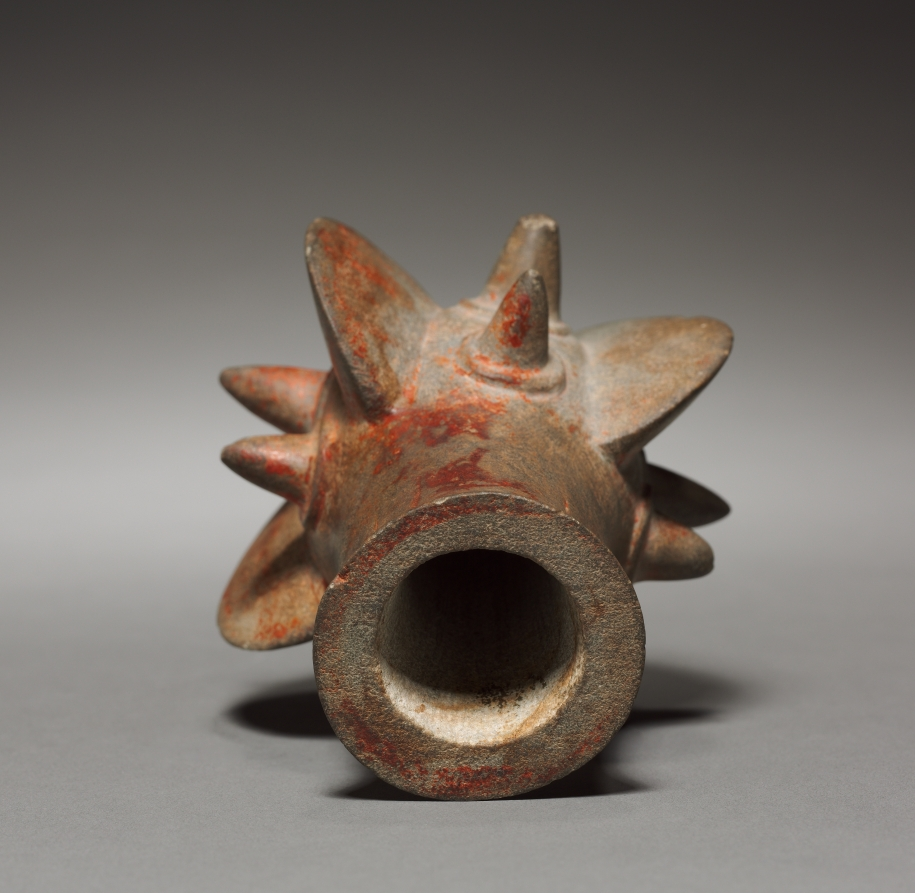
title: Mace Head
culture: North coast of Peru, Salinar culture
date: c. 200 BCE–100 CE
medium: stone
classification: Stone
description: This handsome object was slipped onto a wooden shaft to form a mace, a club-like weapon used in war. It is unclear, however, whether the ancients used examples as well carved as this one in anything but ceremonial circumstances.